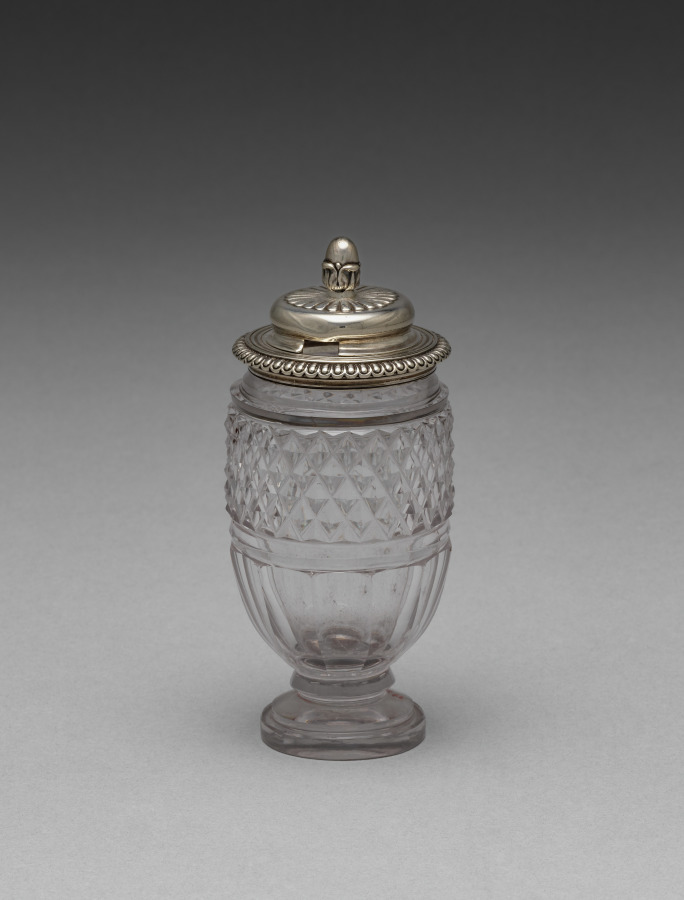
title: Covered Pot (2 of 2)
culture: England, 19th century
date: 1817–18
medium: cut glass and silver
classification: Glass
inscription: Stamped on rim: "PS", George III duty mark, Lion Passant, "b".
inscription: Stamped on lid: "PS", Lion Passant, "b".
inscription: Scratched on base of vessel: "3136".